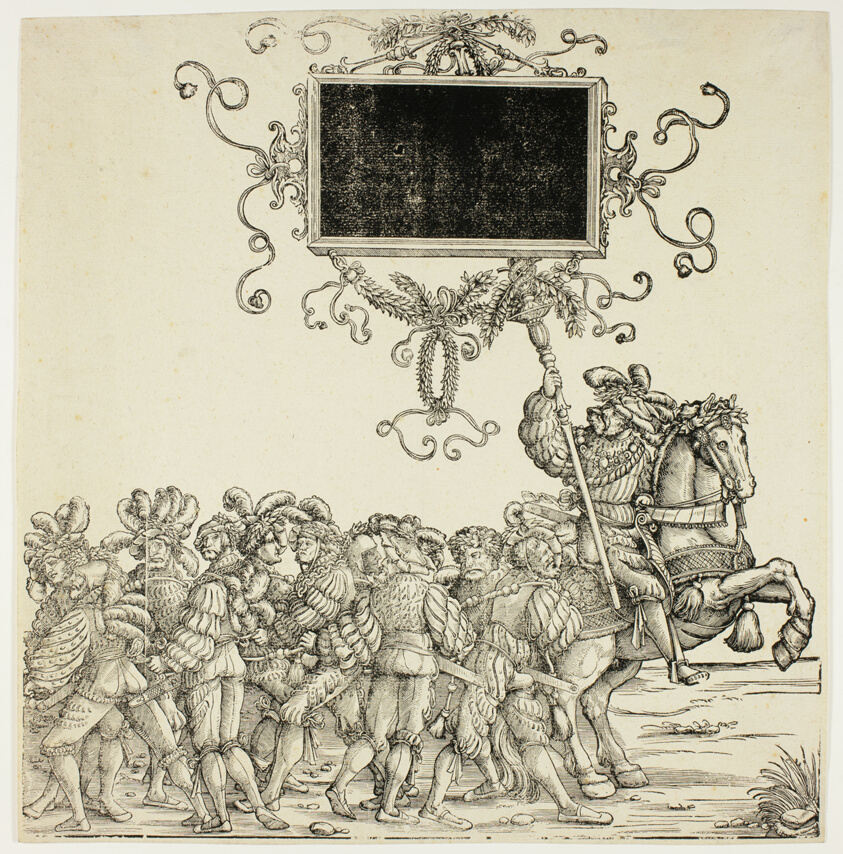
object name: Print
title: Triumph of Maximilian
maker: Hans Burgkmair, the Elder; German, 1473-1531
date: 1526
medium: Woodcut in black on ivory laid paper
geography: Germany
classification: print; prints and drawing